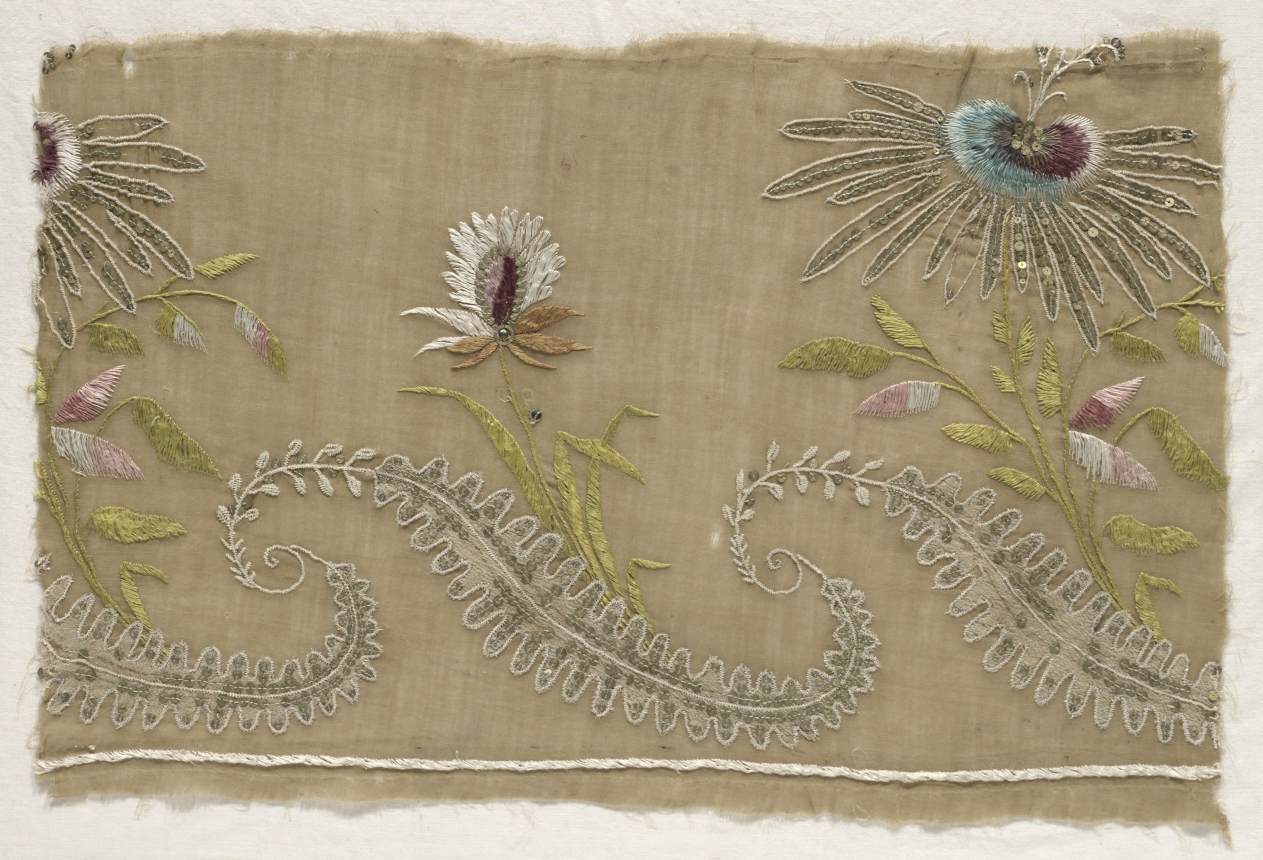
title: Fragment of Embroidery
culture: Spain, Southern, 18th century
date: 18th century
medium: embroidery, silk threads on silk ground, linen appliqué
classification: Embroidery